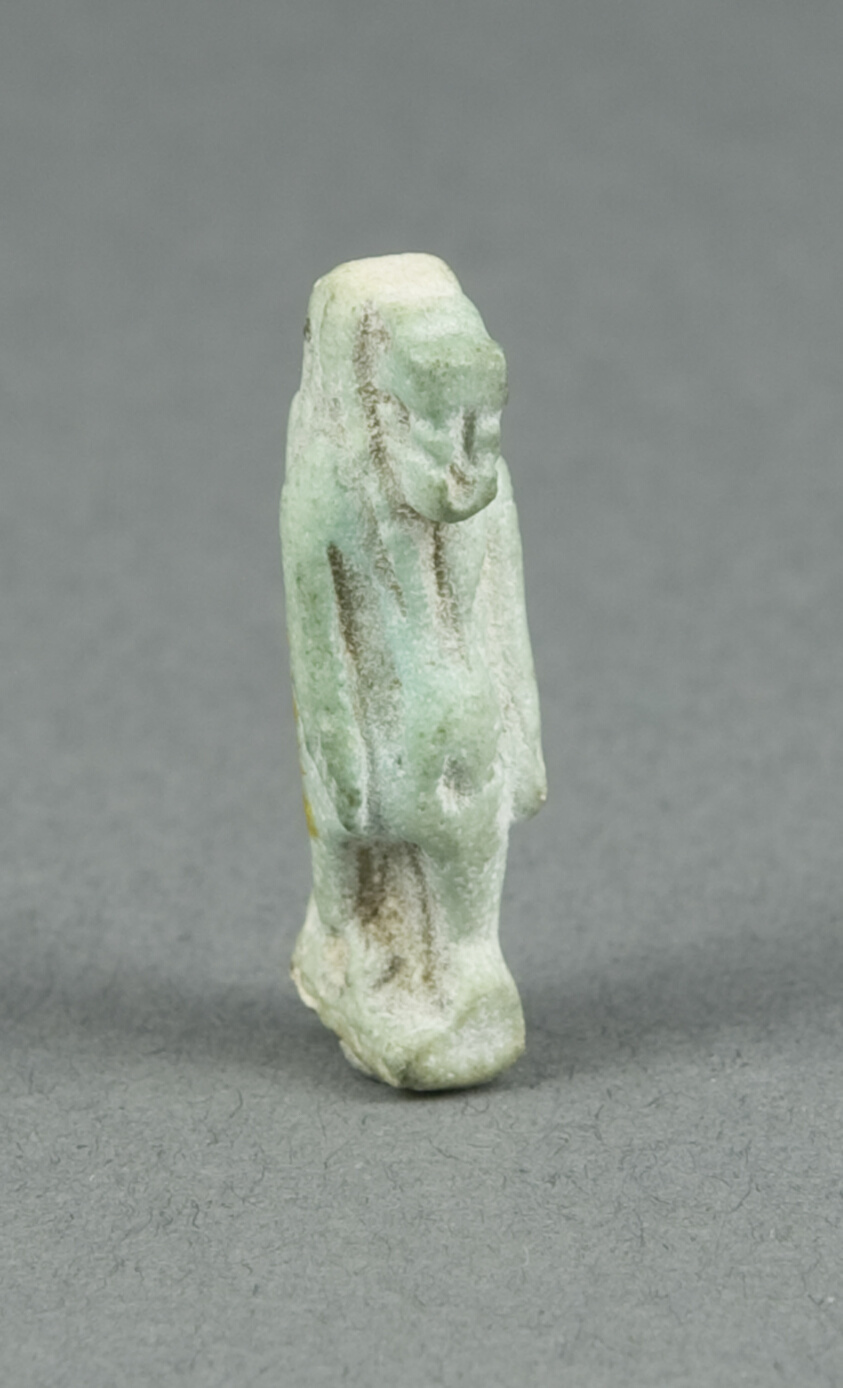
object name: Costume and Accessories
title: Amulet of the Goddess Taweret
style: egyptian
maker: Egyptian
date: Late Period, Dynasty 26–31 (664–332 BCE)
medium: Faience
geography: Egypt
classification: amulet; jewelry; ceramics; ancient art; costume; faïence (composite material)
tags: goddesses